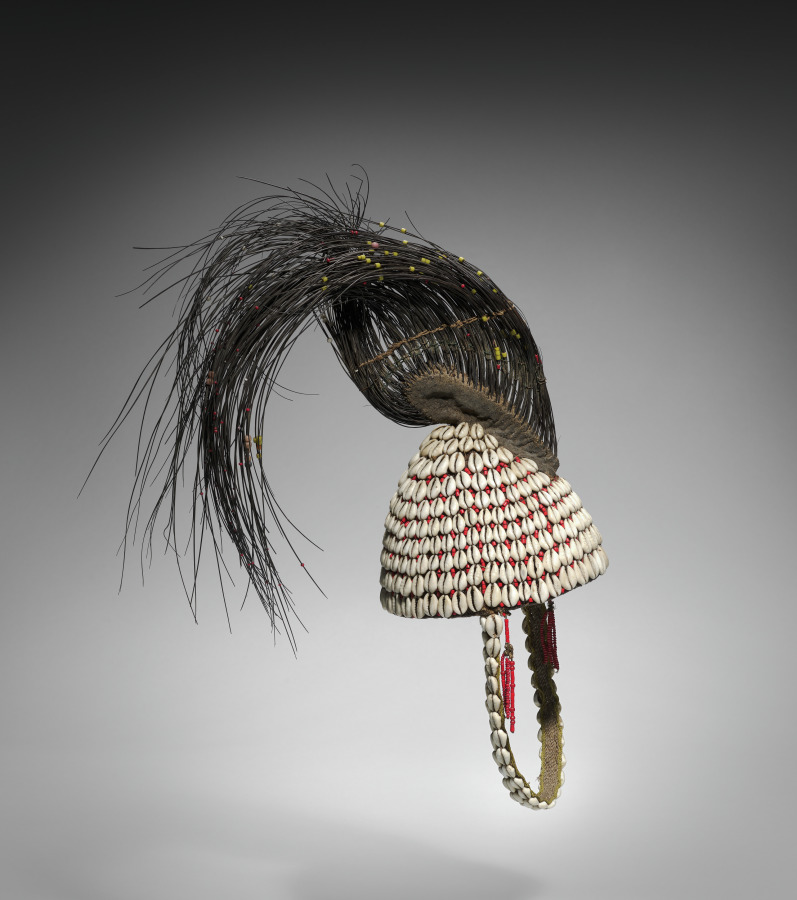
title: Bwami Prestige Cap (Mukuba or Nkumbu)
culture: Africa, Central Africa, Democratic Republic of Congo, Lega-style maker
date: early to mid-1900s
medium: Plant fibers, elephant rawhide and hair, cowrie shells, glass beads, and cord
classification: Garment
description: Hats of different types, sizes, and materials figure prominently in the Lega people’s Bwami association where they indicate status and rank. Cone-shaped hats made of canvas covered with cowrie shells and surmounted by an elephant tail are worn during initiations into kindi, the highest of the five male grades. This prestige cap uses a variety of local and imported materials to show its wearer's importance. The plant fibers that support the hat and the elephant hair were sourced in Central Africa, while the beads and cowrie shells were imported. The beads were made in Europe, while the cowrie shells came from the Indian Ocean region. The might of Bwami members is likened to the elephant’s potentially destructive strength.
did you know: While identified with Africa, cowrie shells were generally imported from the Indian Ocean region. After being collected near the Maldives islands, these Indo-Pacific shells entered parts of Africa via overseas trade routes.